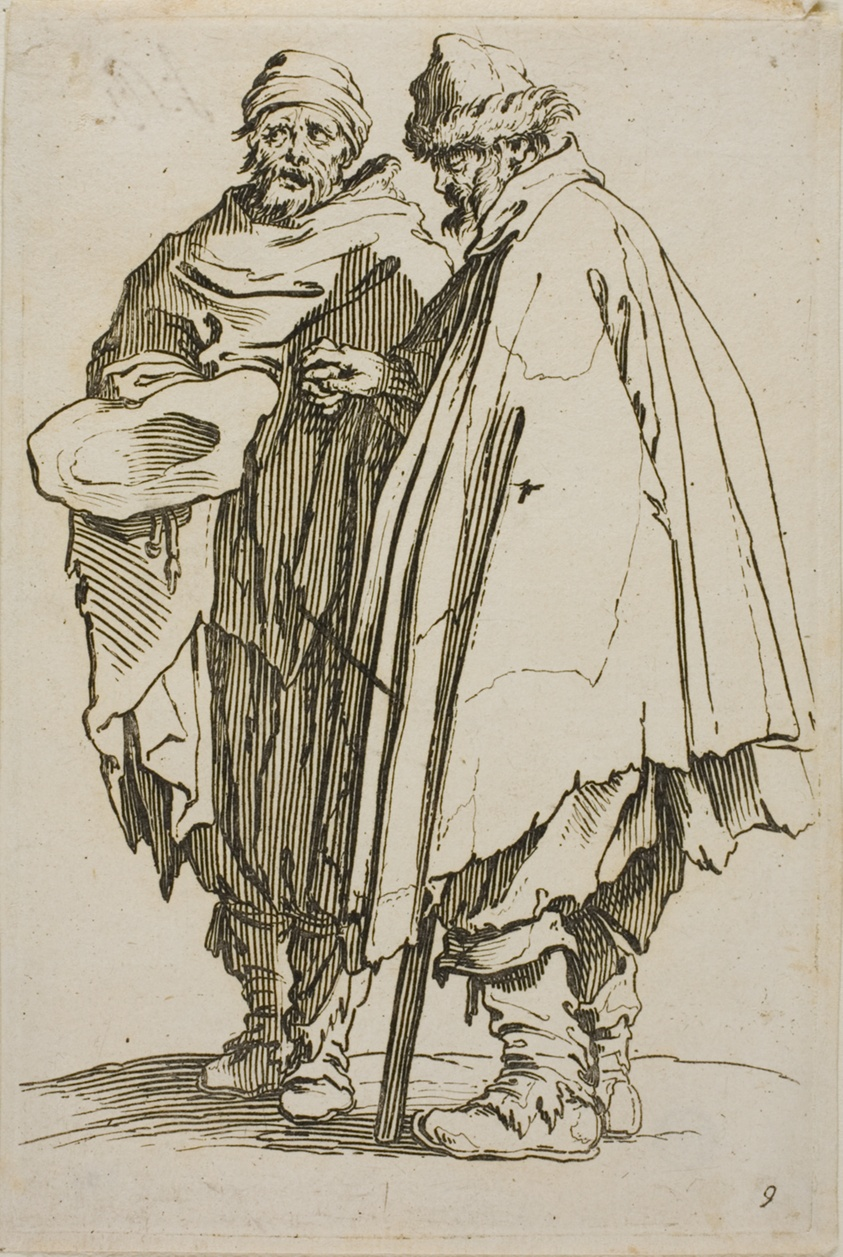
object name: Print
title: The Blind Man and his Companion, plate nine from The Beggars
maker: Jacques Callot (French, 1592-1635)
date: c. 1622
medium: Etching on paper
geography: France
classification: etching; print; prints and drawing